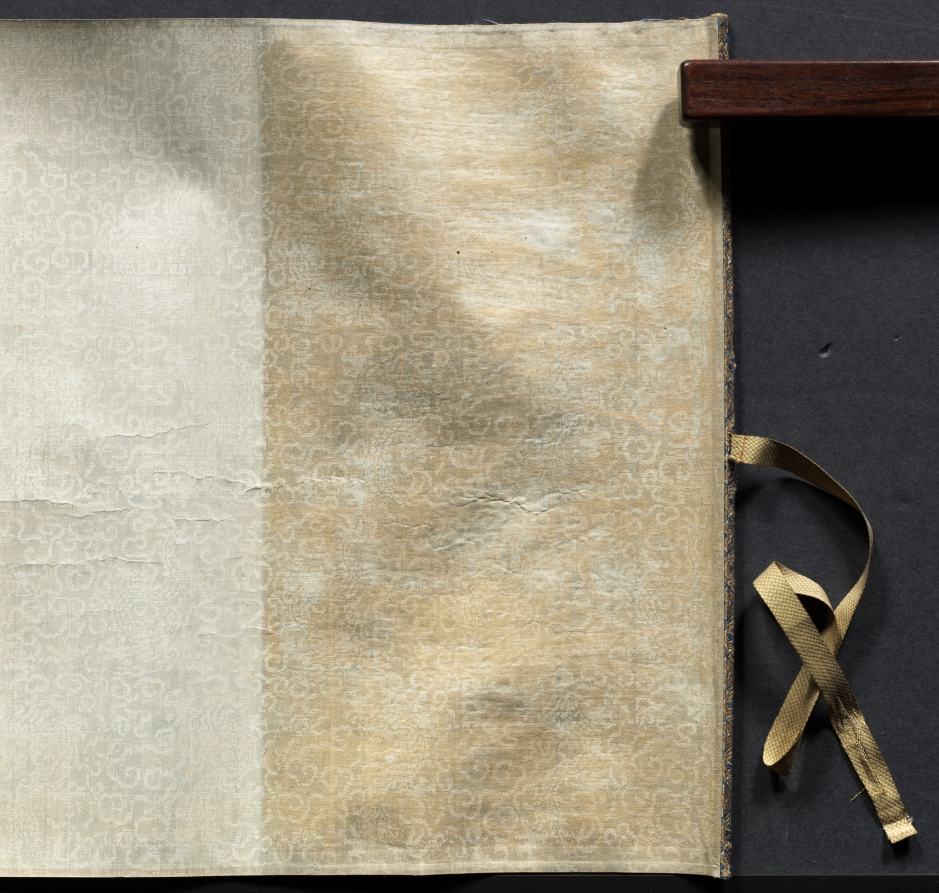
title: Landscape, The Palace of the Clouds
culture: China, Qing dynasty (1644-1911)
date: 1644–1911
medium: handscroll, ink on silk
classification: Painting